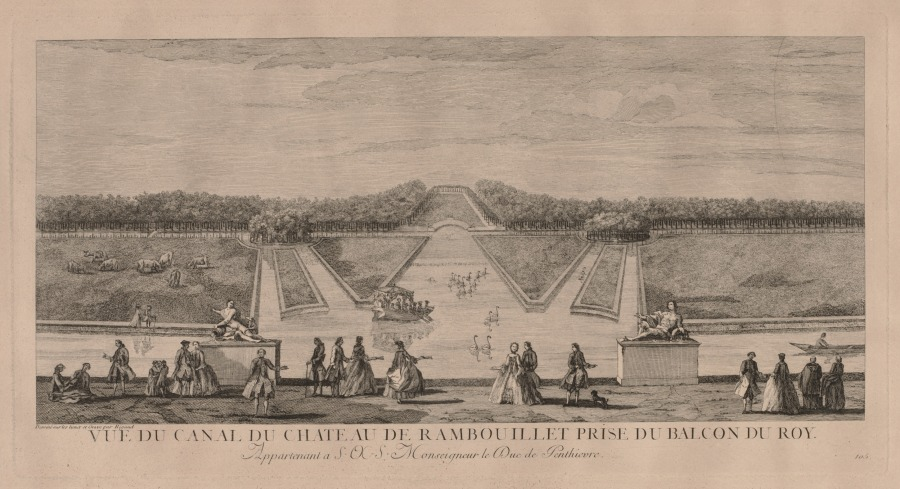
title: The Chateau from the Canal at Rambouillet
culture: France, 18th century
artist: Jacques Rigaud (French, 1681–1754)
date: c. 1720–50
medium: engraving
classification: Print